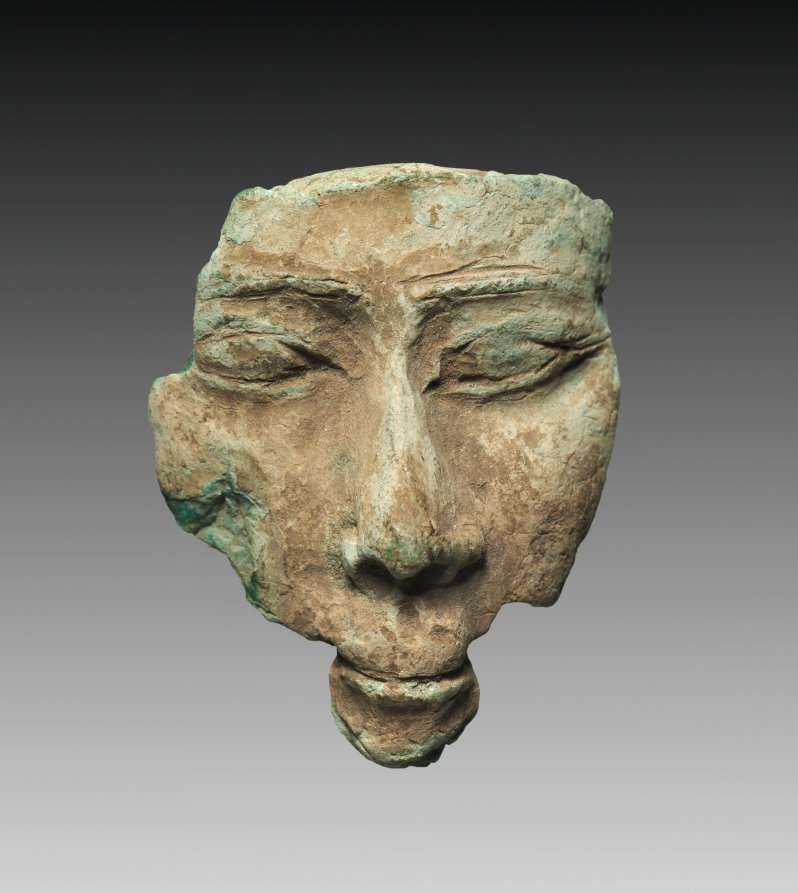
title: Mask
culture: Egypt, probably Greco-Roman period (332 BCE–395 CE)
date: 332 BCE–395 CE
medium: wax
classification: Funerary Equipment